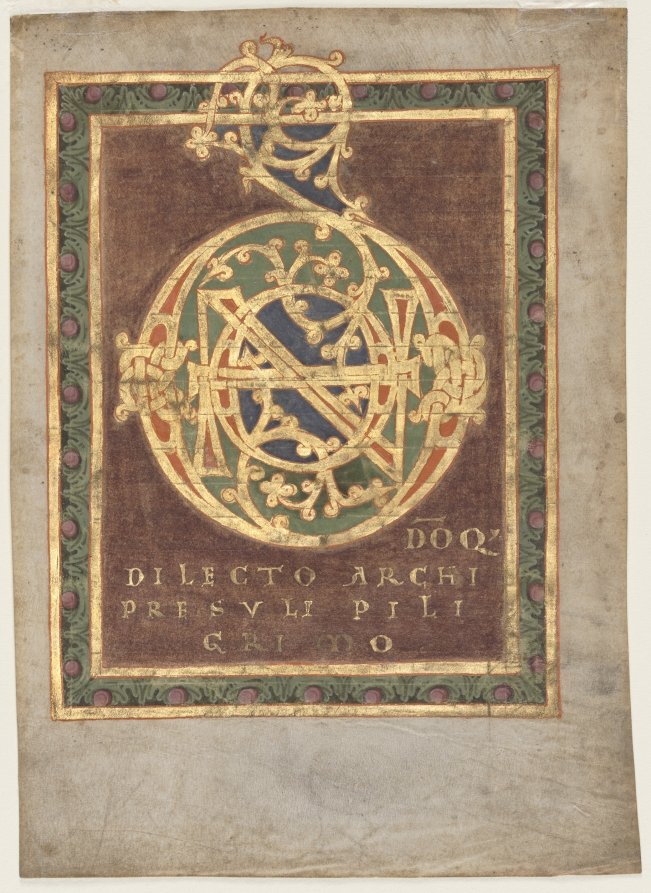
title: Title Page of Abbot Berno's "Tonarius:" Initial D[omino]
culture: Germany, Abbey of Reichenau, 11th century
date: c.1030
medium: ink, tempera, and gold on vellum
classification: Manuscript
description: This leaf originally served as the dedication page of the Tonarius, or Tonary, written by Reichenau's Abbot Berno (1008-1048). A tonary was a music manual used to regulate liturgical chants. Berno's manuscript was presented to Archbishop Pilgrim of Cologne (1021-1036) whose name appears at the bottom of this leaf.